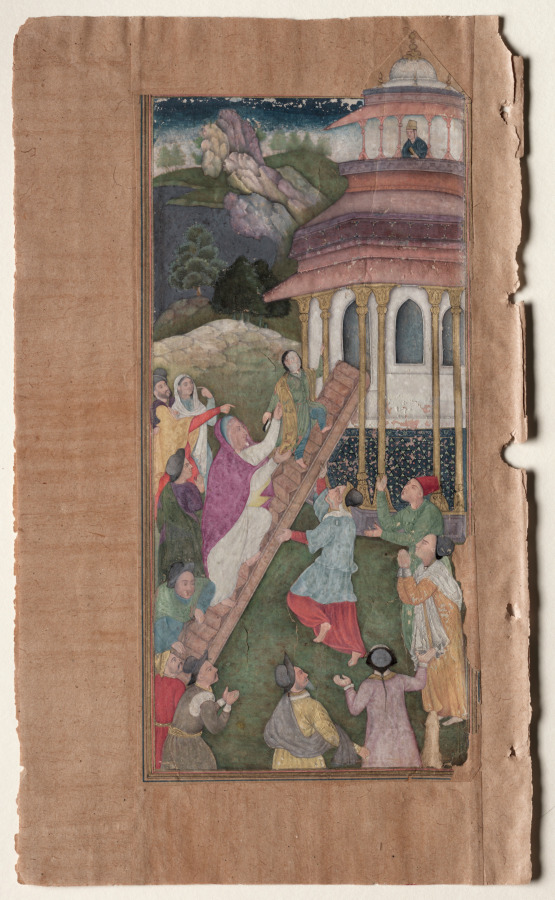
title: Mary ascends the stairs to the temple, from a Mirror of Holiness (Mir’at al-quds) of Father Jerome Xavier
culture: Mughal India, Allahabad, made for Prince Salim (1569–1627)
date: 1602–4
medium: Gum tempera, ink, color, and gold on paper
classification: Manuscript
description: Three-year-old Mary bounds up the stairs of the temple, eager to begin her education. Onlookers gesture in surprise. In the background the rocks have been cleverly shaded to look like faces—a Persian technique of visual double-entendre that the Mughals admired and adopted. This work is the second of the 27 surviving paintings made for this manuscript. The first, a scene of Mary’s birth, is in a private collection in Europe. Mary’s face had been painted with a fragile white paint, which has fallen off. Now only the underdrawing remains visible.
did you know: Mary’s instructor awaits her, book in hand, at the top of a temple of learning.